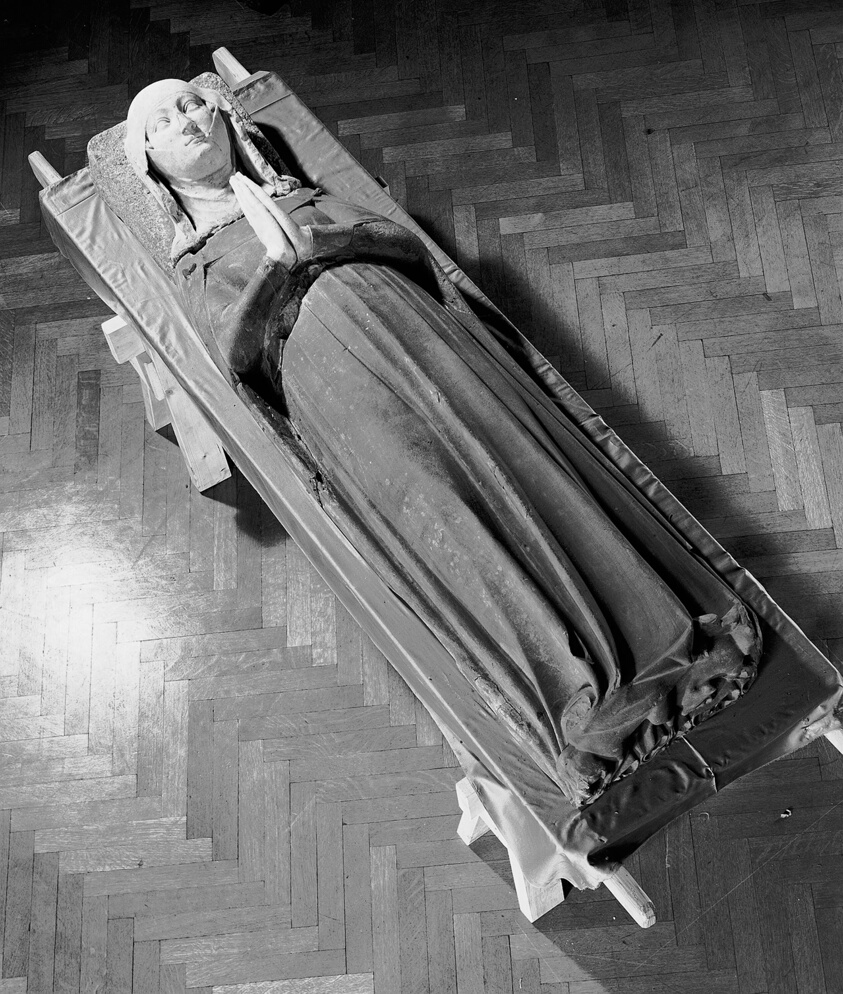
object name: Sculpture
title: Female Tomb Figure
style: 14th century, medieval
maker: French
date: c. 1350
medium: Marble and basalt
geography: France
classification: large scale; sculpture; effigy; figure; sculpture/stone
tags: woman, effigy, figure, prayer, tombs